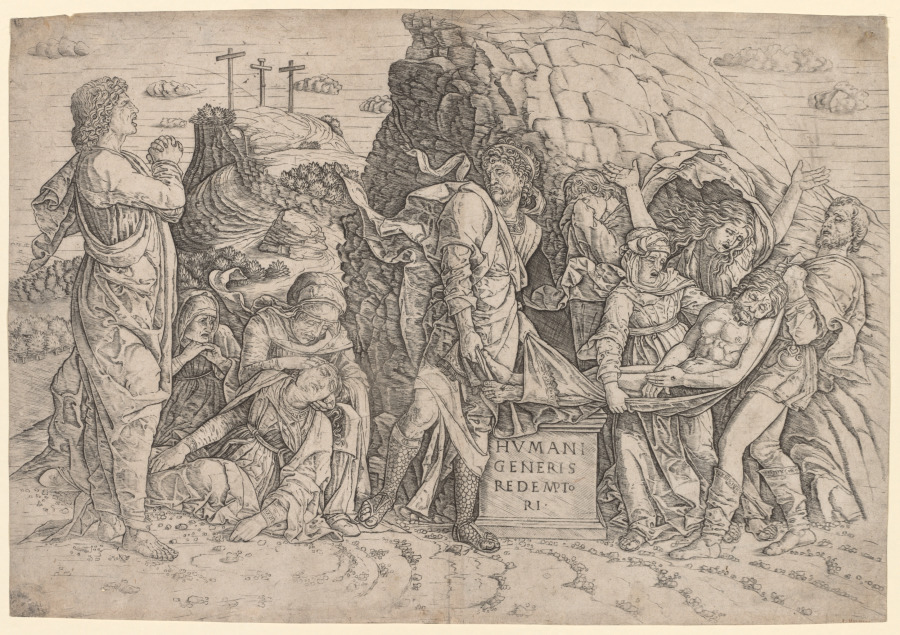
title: Entombment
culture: Italy, 15th century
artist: Giovanni Antonio da Brescia (Italian, 1450–1530)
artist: after Andrea Mantegna (Italian, about 1431–1506)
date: c. 1509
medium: engraving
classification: Print